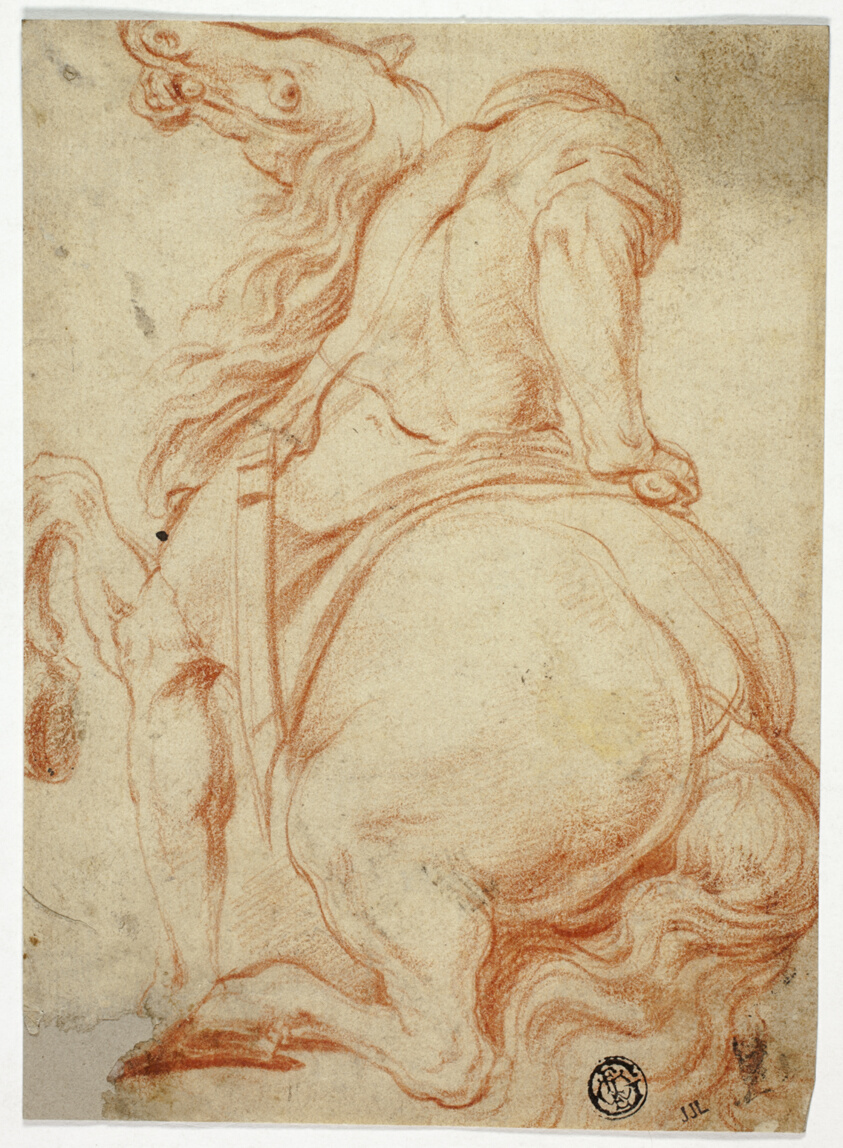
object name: Drawing and Watercolor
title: Man on Rearing Horse, Seen from Behind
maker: Style of Charles Parrocel (French, 1688-1752); or Cherubino Alberti (Italian, 1553-1615); or Antonio Tempesta (Italian, 1555-1630); or Guiseppe Cesari (Italian, 1568-1640)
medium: Red chalk on cream laid paper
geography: France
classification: chalk; drawings (visual works); prints and drawing